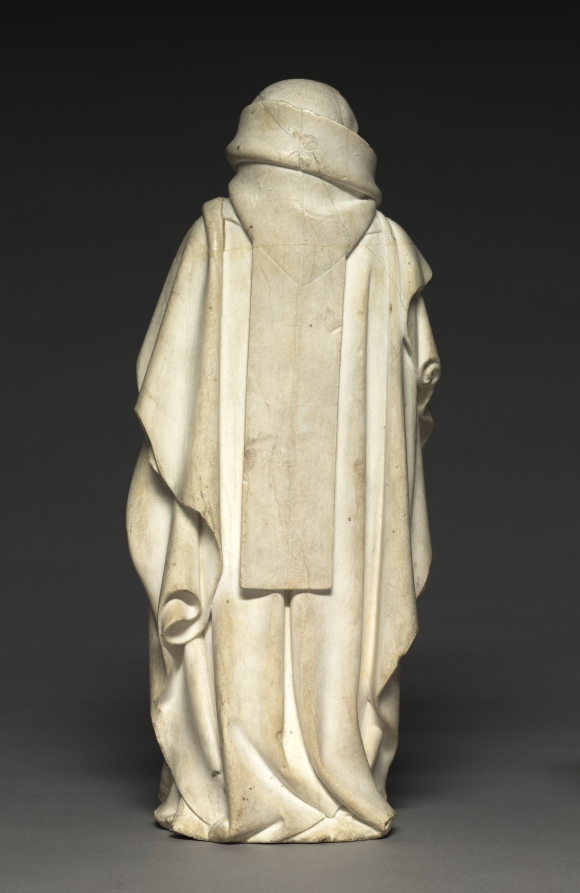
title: Mourner from the Tomb of Philip the Bold, Duke of Burgundy (1364–1404)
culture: Netherlands, active Dijon, 15th century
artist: Claus de Werve (Netherlandish, 1380–1439)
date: 1404–10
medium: vizille alabaster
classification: Sculpture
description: This figure comes from the tomb of Duke Philip the Bold from the church of Champmol near Dijon (Burgundy, France). Philip, who founded the monastery and designated it as his burial place, hired the best artists, many of whom came from the Netherlands. While the commission was given in 1381, the work was not completed until 1410, six years after the duke’s death. This mourner is unusual for the time because it is not carved as a static low relief on the pedestal of the tomb but interact with the viewers and their fellow procession members. The lifelike quality of the figure is due in large part to the alabaster. Its softness allowed artists to carve details into the material, and the transparent, milky white stone could also be polished to a high gloss.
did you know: The use of alabaster in the late Middle Ages began in the 1300s with court art in the circles of French kings, especially in the field of funerary sculpture.